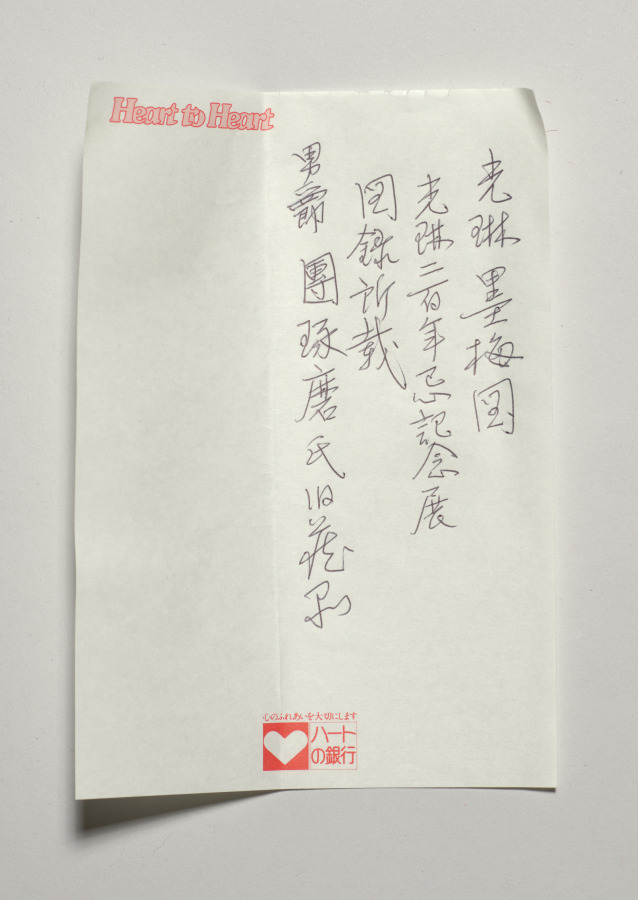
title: Plum Tree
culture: Japan, Edo period (1615–1868)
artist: Ogata Kōrin (Japanese, 1658–1716)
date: c. 1700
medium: hanging scroll; ink on silk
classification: Painting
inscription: Artist's signature and seal above hillock bottom right corner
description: Ogata Kōrin had to think through his design carefully to create these white plum blossoms and deliver their effect, as he used the reserve technique—where selected areas of the painting surface are left unpainted—to achieve it. He probably roughed in the tree before applying an ink wash to the entire silk surface, except where he intended to place the flowers. He likely then returned to articulate the petals and, in some cases, the pistils and stamens. The composition shows the tree twisting out of view, only to return with a branch of new growth jabbing forth from an old, broken limb, thereby heightening the visual impact of the blossoms.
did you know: The Rinpa style of painting is named for Ogata Kōrin, even though he did not create it.